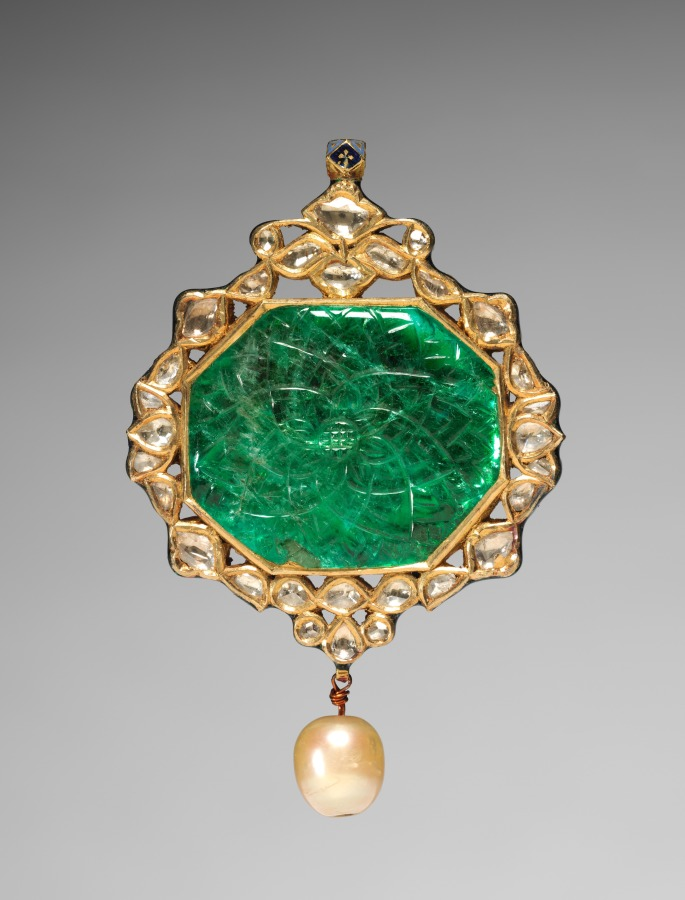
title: Pendant with Chain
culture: Northwestern India, Rajasthan, Rajput Kingdom of Jaipur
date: 1700s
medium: Gold, emerald, diamonds, enamel, and pearl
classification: Jewelry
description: The central emerald has been subtly incised with a many-petaled lotus flower, a symbol of the sun, suggesting the radiance of the outsize gem. The enameling on the back depicts a peacock with a pair of peahens amid flowers. Peacocks signal the monsoon rains. The refined use of enamel indicates that this piece was assembled in the specialized workshops of Jaipur, but the size of the emerald suggests that it was made for imperial use.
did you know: The bright color of the emerald indicates it was sourced in South America.